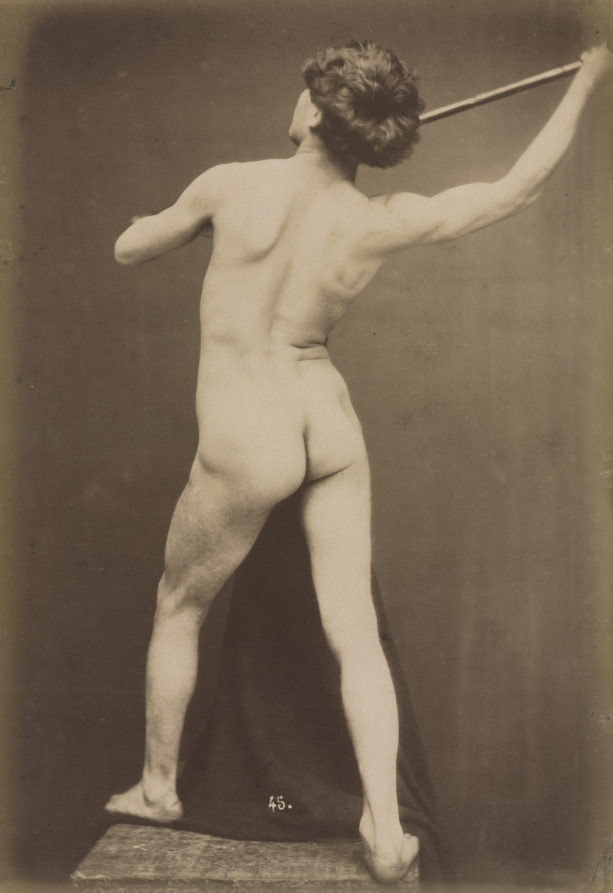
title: Male Nude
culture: France, 19th century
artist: Guglielmo Marconi (French, 1842–after 1885)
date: c. 1870–75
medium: albumen print from wet collodion negative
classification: Photograph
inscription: Written in negative: "45."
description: This photograph illustrates the developing close association in the late 1800s between photographers and artists. Guglielmo Marconi specialized in nude studies for use by painters and sculptors. Using children, women, and men as models, he photographed a variety of poses traditionally employed by models in academic studios. Artists purchased them because working from a photograph was much cheaper than hiring a live model.